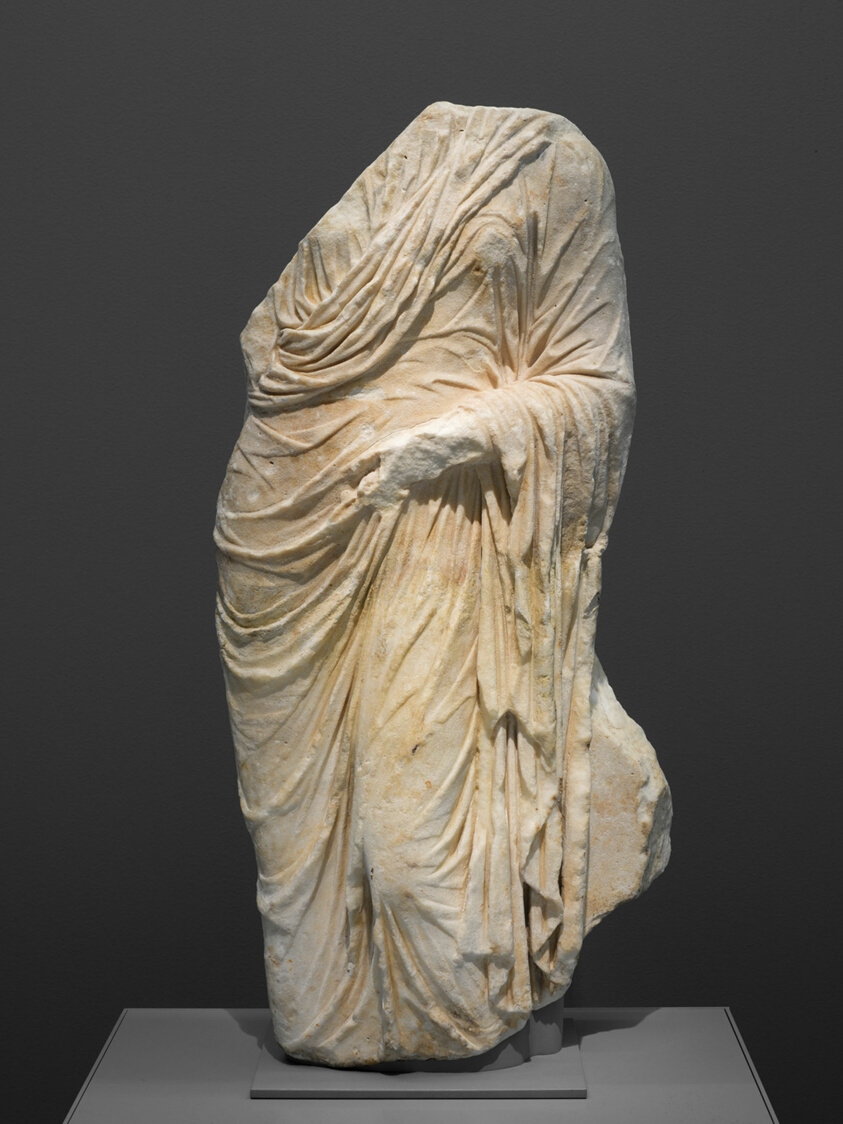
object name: Funerary Object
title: Fragment of a Grave Monument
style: greek, ancient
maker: Greek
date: 4th-3rd century BCE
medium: Marble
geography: Ancient Greece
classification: architectural fragment; marble; stone; sculpture; ancient art